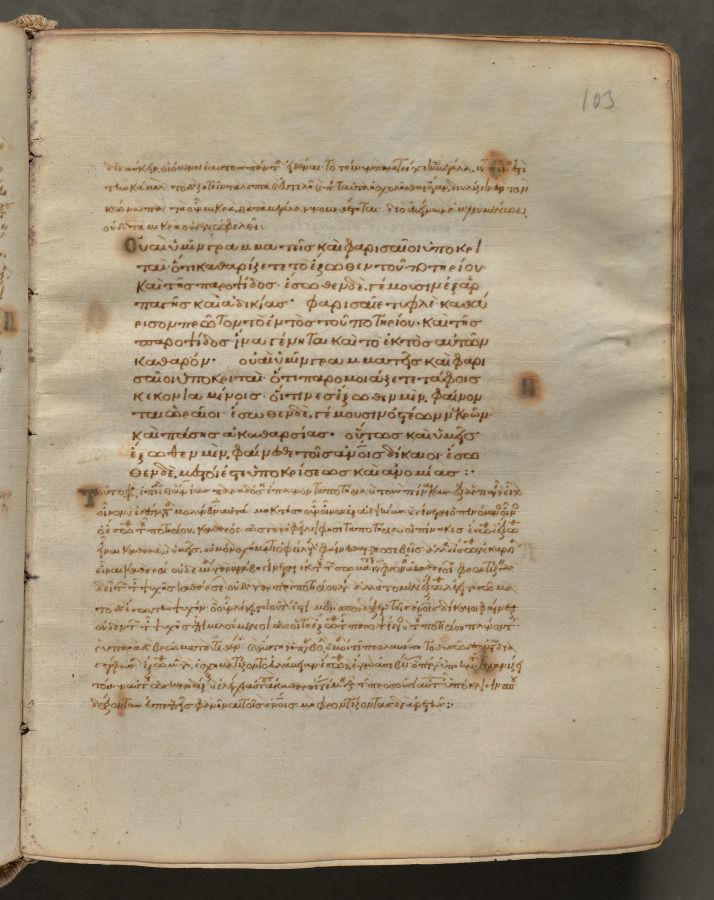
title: Text, folio 103 (recto), from a Gospel Book with Commentaries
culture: Byzantium, Constantinople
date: c. 1000–1100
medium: ink, tempera, and gold on vellum; leather binding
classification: Bound Volume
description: Each of the four gospels in this book opens on a page with brilliantly illuminated borders depicting the author of the text as well as birds-principally peacocks, symbols of the immortality of the soul-and fountains, representing the fountain of life and the salvation of the soul. This volume consists of 428 leaves with texts in Greek. Its level of sophistication suggests that it was probably written and decorated in a monastery in Constantinople.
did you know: Gospel Books were carried in procession through Byzantine churches.